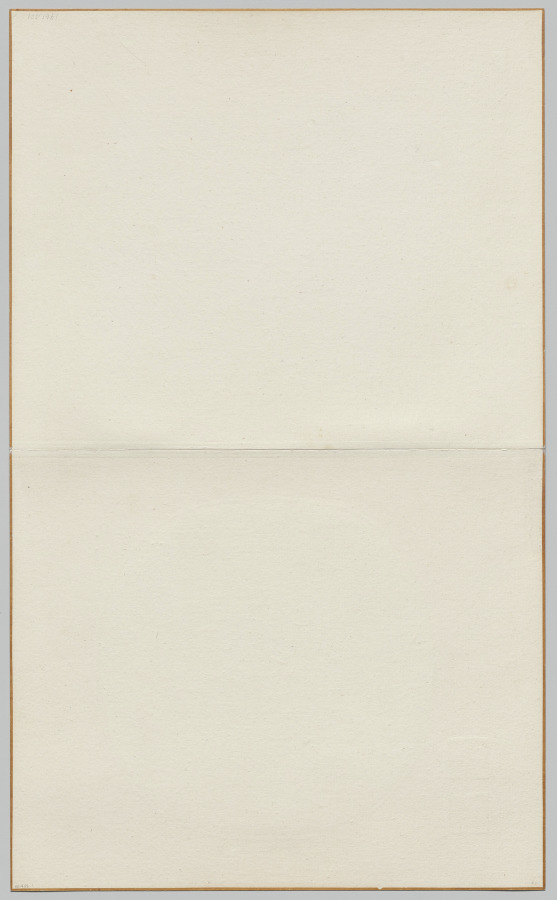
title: Scholar Reclining and Watching Rising Clouds, Poem by Wang Wei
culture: China, Southern Song dynasty (1127-1279)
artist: Ma Lin (Chinese, c. 1185–after 1260)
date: c. 1256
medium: Album leaf; ink on silk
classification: Painting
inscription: 臣馬麟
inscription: 2 seals on mounting of Chu Sheng-chai (20th c.).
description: Poem and painting, once mounted together as one fan, exemplify the collaboration between imperial patron and court painter. Emperor Lizong’s calligraphy cites a verse from Wang Wei’s (701–761) poem, Walking to where the water ends, I sit and watch when clouds arise. Ma Lin’s response is this painting. At the water’s edge, a scholar reclines by a large rock. The view leads across the empty middle ground to a distant mountain. With sparse ink and subtly graded washes, Ma Lin visualizes the poetic verse. The painting suggests the impact of Chan aesthetics through interaction between the palace, literati-officials, and monasteries around Hangzhou.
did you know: Ma Lin was the son of Ma Yuan, the artist renowned for his unique composition and often referred to as "One-corner Ma."